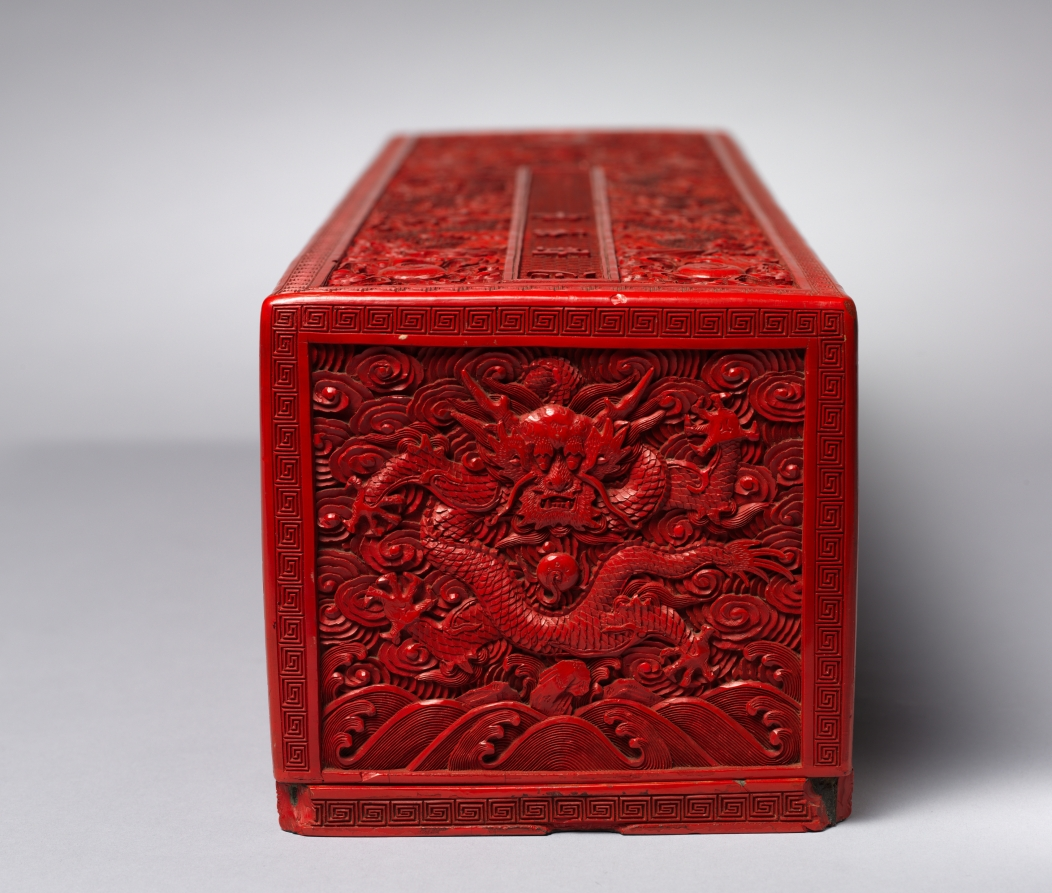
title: Carved Lacquer Scroll Box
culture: China, Qing dynasty (1644–1911), Qianlong reign (1736–95)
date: 1736–95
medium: Red carved lacquer on wood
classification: Lacquer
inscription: 心寫治平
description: The elaborate design, superior craftsmanship, and inscription carved into the red cinnabar lacquer proclaim the imperial pedigree of this scroll box. On either end is a five-clawed dragon, a design reserved only for an emperor. More dragons twist and wind through swirling clouds and waves along the length of the box’s sides and top. The carving is intricate and vigorous, while the design is controlled and regular. This box housed the private portraits of the Qianlong Emperor, his empress, and 11 other favorites among his presumed 40 or more wives during his 60-year reign. It was commissioned to be made in Suzhou when no more portraits were added to the scroll. An entry in the imperial workshop records relates to the Cleveland box. It states that in 1787, a box design with a dragon pattern, including the inscription, In his heart is envisioned a peaceful reign, was sent to a Suzhou workshop. Imperial portraits were collected in the Chonghua Palace in the Forbidden City, and the emperor’s portrait was kept in this red lacquer box from Suzhou.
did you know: This is the original box for the handscroll Portraits of the Qianlong Emperor and His Twelve Consorts, CMA 1969.31.